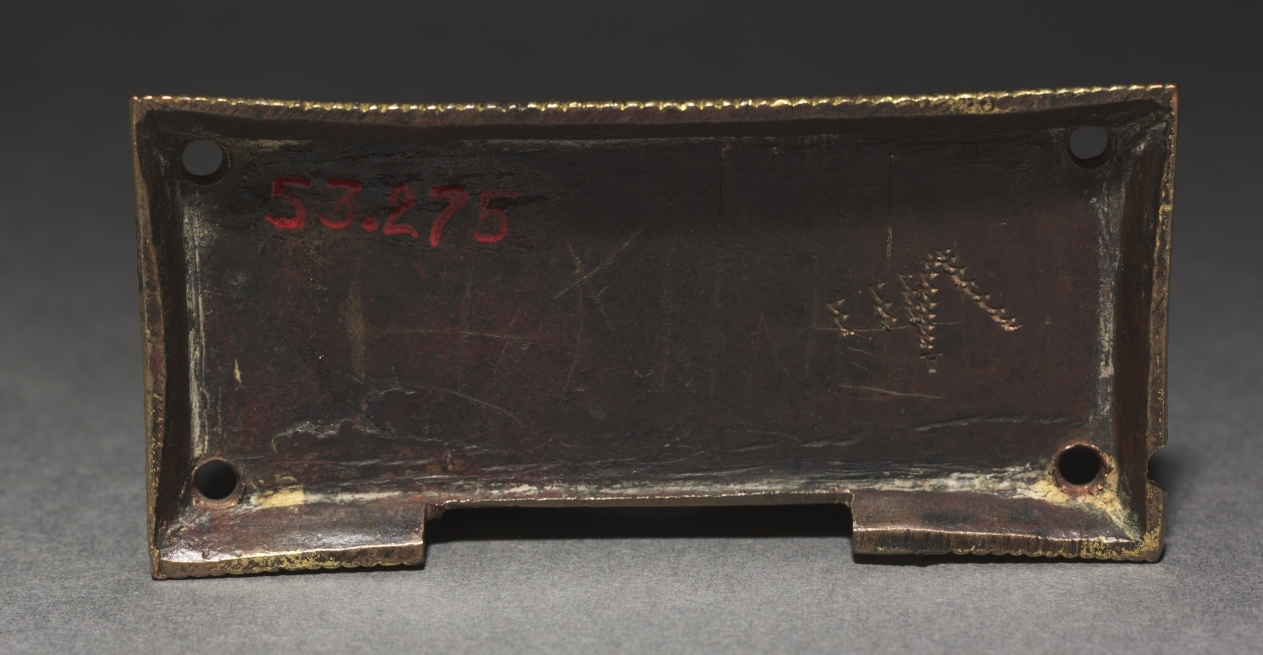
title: Plaque, probably from a Reliquary Shrine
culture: Germany, Rhine Valley, Cologne, Romanesque period, 12th century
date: c. 1180–1190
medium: gilded copper, champlevé and cloisonné enamel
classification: Enamel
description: This enamel plaque has been linked to the original decoration of the Shrine of the Three Kings in Cologne Cathedral, attributed to Nicholas of Verdun, one of the most important goldsmiths of the late 12th century.